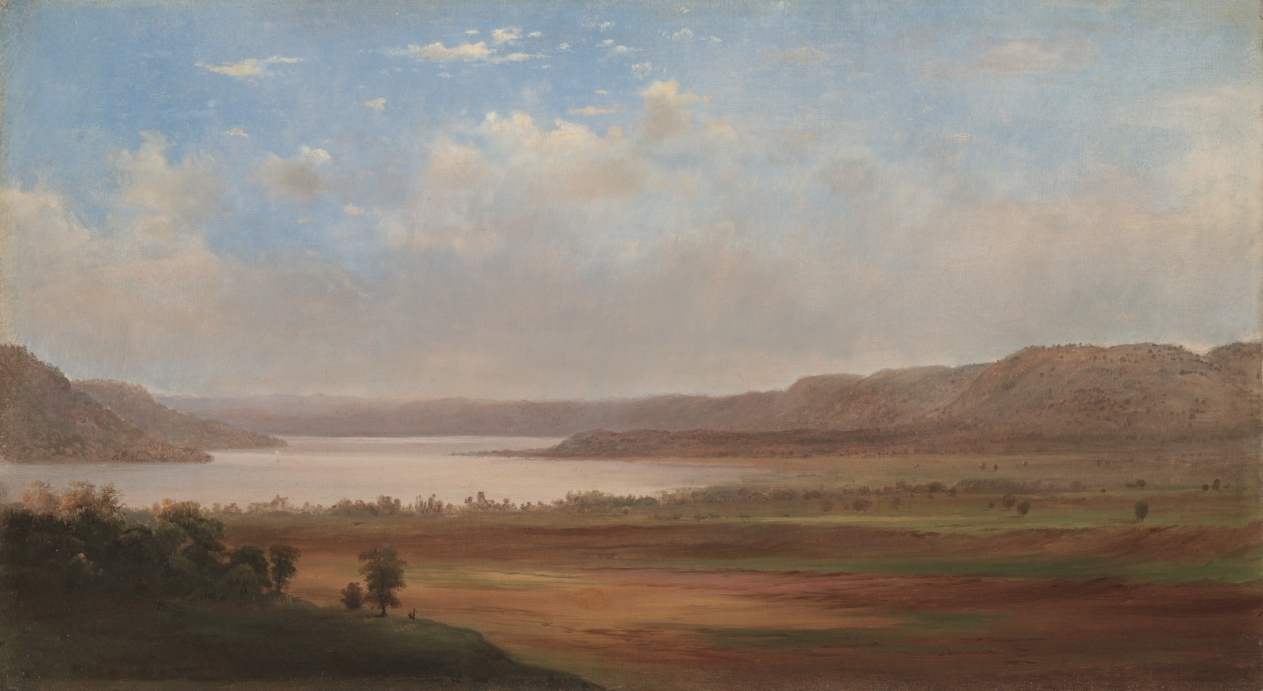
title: View of Lake Pepin, Minnesota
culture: America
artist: Robert S. Duncanson (American, 1821–1872)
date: 1862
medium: oil on canvas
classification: Painting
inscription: Signed lower left: R.S.D. / 1862; signed on verso: Valley of Lake Pepin/Minnesota/Painted By R.S.D.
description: Duncanson was the first African American painter to achieve recognition at home and abroad. Although most of his career was spent in Cincinnati, he painted this calm, panoramic scene during a journey up the Mississippi River to Canada, which he likely made to escape the upheaval of the Civil War. Duncanson worked in Montreal and London, England, before returning home after the war.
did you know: The sport of waterskiing was invented on Lake Pepin in 1922.